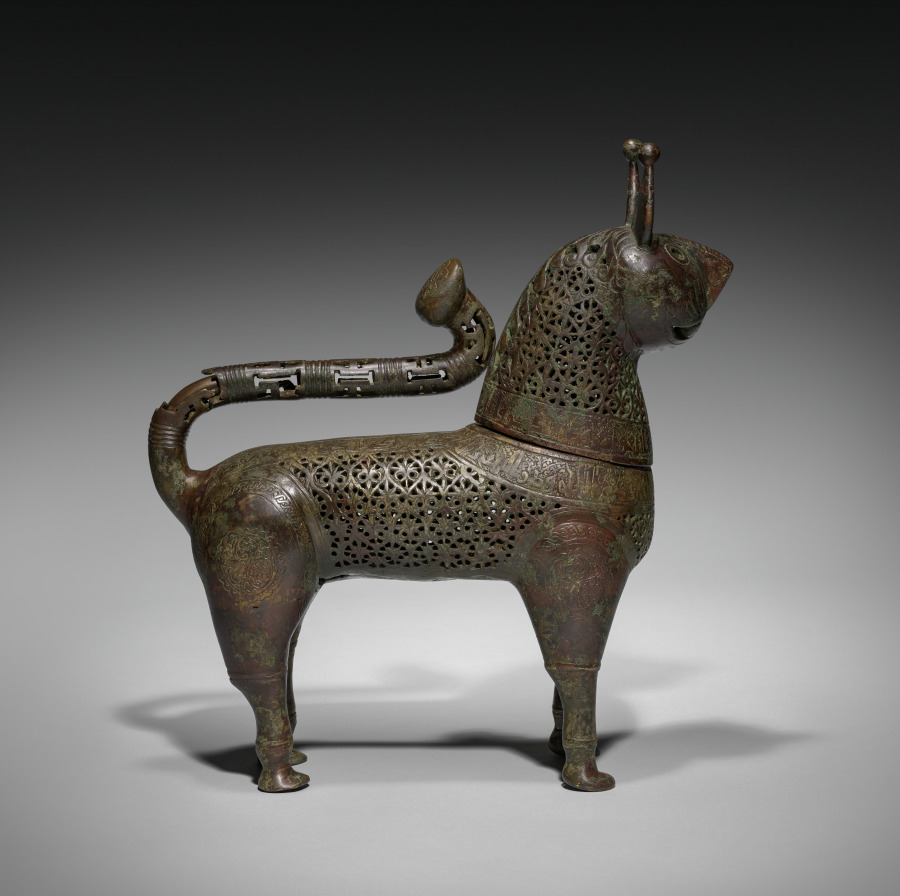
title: Feline Incense Burner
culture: Iran, Khurasan, Seljuq period of Iran (1037–1194)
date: 1150–1200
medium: Copper alloy, cast, engraved, chased, and pierced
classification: Metalwork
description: In Iran during the 1000s and 1100s, vessels in the shape of animals gained popularity, especially as incense burners. Felines were favored in Persian art and this piece may represent a caracal, a type of lynx. The head of the creature was cast separately and is removable to fill its body with hot coals and incense. Qur’anic verses on the neck and spine remind worshippers to set work aside, attend prayer, and then disperse to seek God’s bounty. The diffusion of perfumed smoke through the burner’s pierced palmette design may have served as a sensorial reminder of this teaching.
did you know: Arabic inscriptions in Kufic script against a background of scrolling arabesques run along the back and neck of the feline form.